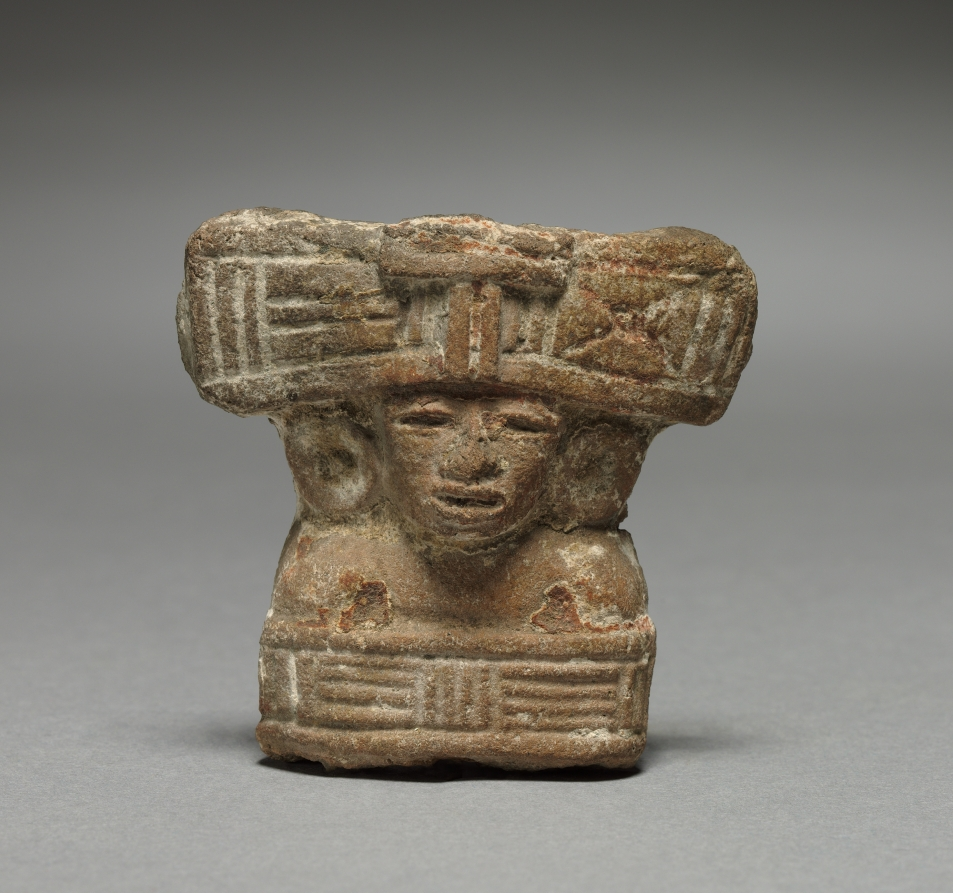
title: Figurine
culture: Mexico, Teotihuacan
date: 1–750 CE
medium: pottery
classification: Ceramic